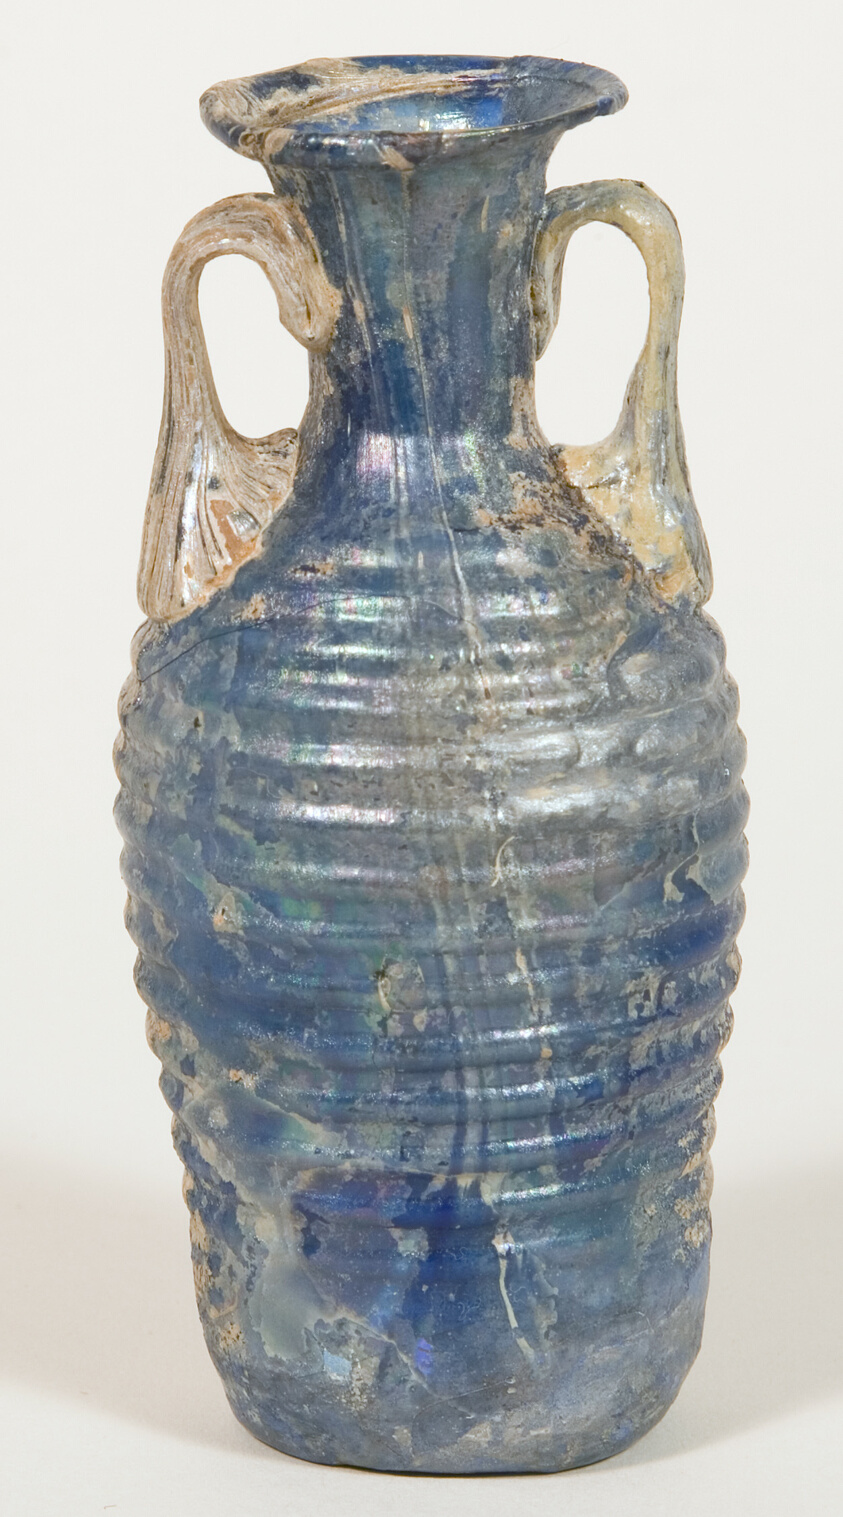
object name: Vessel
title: Amphoriskos (Container for Oil)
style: roman (ancient, style or period), ancient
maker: Roman; probably Syria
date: 1st century CE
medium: Glass, mold-blown technique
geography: Syria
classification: container; amphoriskos; glass; vessel; ancient art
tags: containers